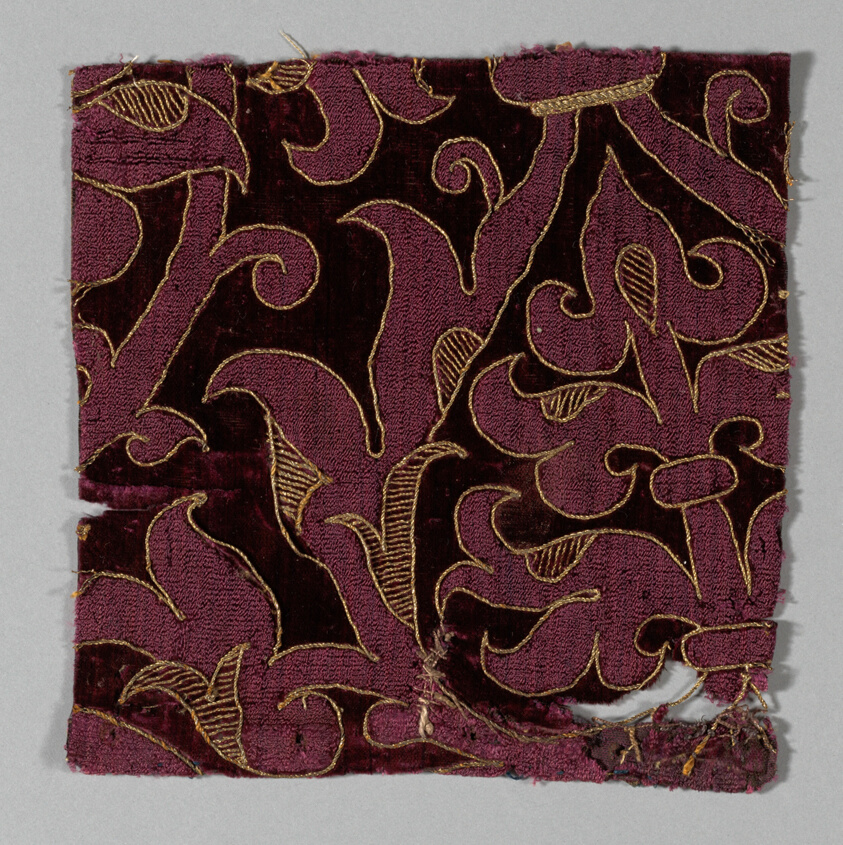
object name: Textile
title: Fragment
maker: Italy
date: 1525/75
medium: Silk and gilt-metal-strip-wrapped silk, broken warp chevron twill weave with supplementary warps forming cut, uncut, and solid velvet, embroidered with silk in couching and laid work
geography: Italy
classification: textile; weaving - velvet; weaving